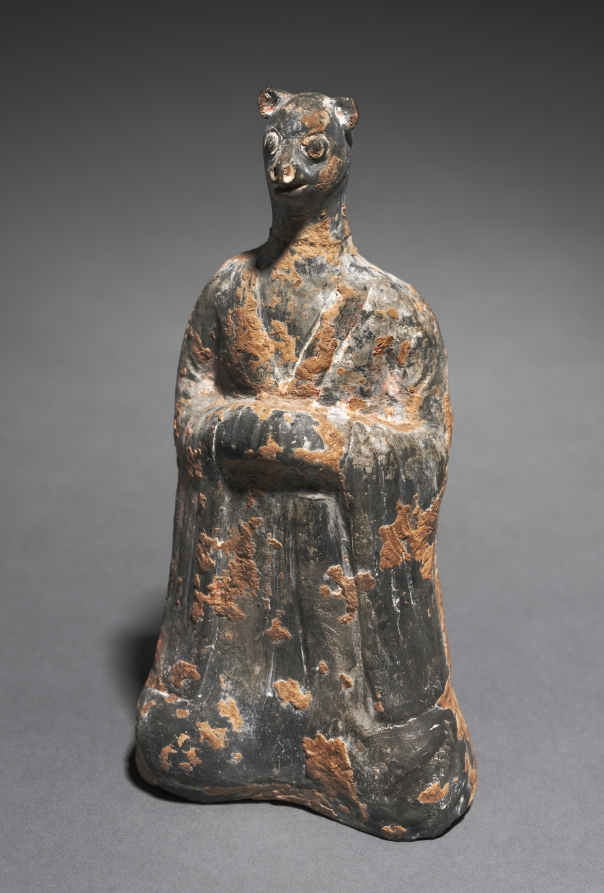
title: Mortuary Figure of the Zodiac Sign: Monkey (Sagittarius)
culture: China, Northern Wei dynasty (386-534)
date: 500s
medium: gray earthenware with traces of slip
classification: Sculpture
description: The twelve-animal zodiac series—rat, ox, tiger, rabbit, dragon, snake, horse, goat, monkey, rooster, dog, and boar—signifies a traditional Chinese concept of time structured in a cyclical order. The twelve animals are also linked to the art of fortune-telling that underlies human existence in connection with the changes of the universe. The use of the twelve zodiac animals as tomb furniture suggests they provided a cosmological structure for the afterlife.